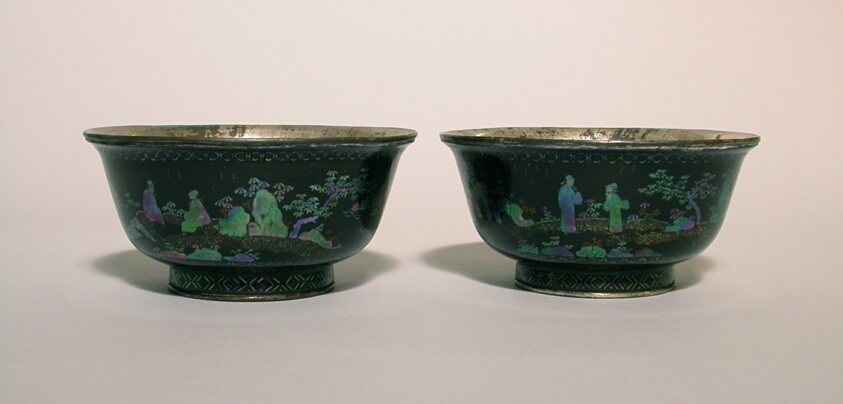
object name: Vessel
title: Pair of Bowls with Mother-of-Pearl Inlay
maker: China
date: Qing dynasty (1644-1911)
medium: Mother-of-pearl inlay, silver base (?) and interior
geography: China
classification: lacquerware; asian art